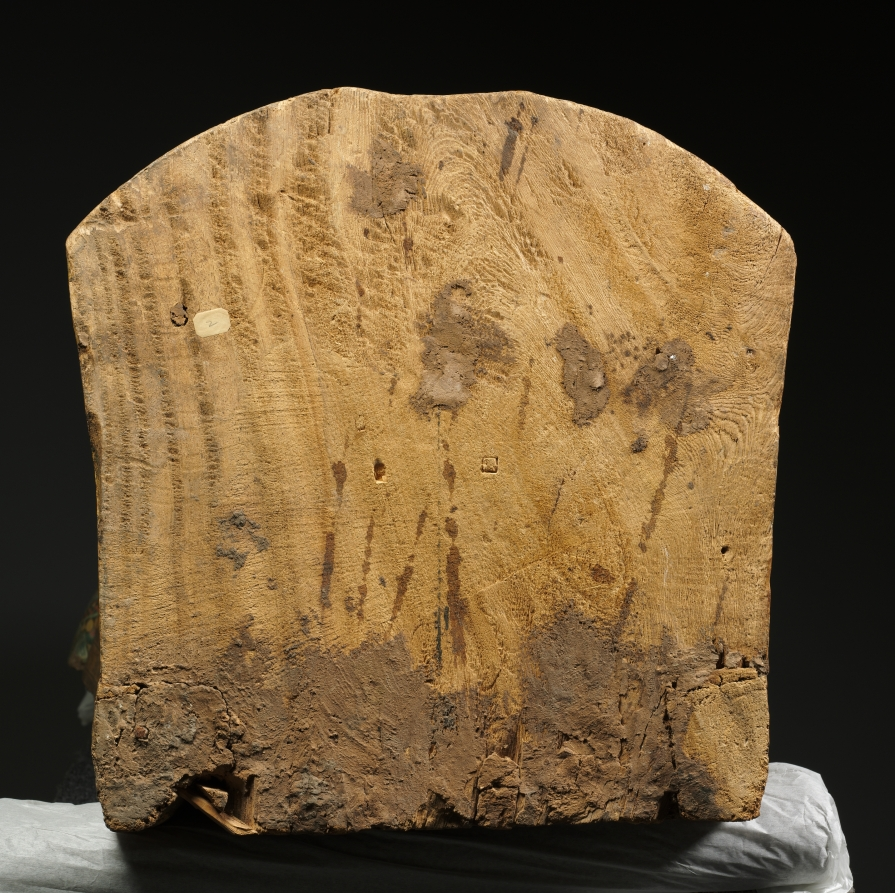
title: Coffin of Bakenmut (lid)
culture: Egypt, Thebes, Third Intermediate (1069–715 BCE), Dynasties 21–22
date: c. 1000–900 BCE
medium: gessoed and painted sycamore fig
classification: Funerary Equipment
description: The coffin of Bakenmut is one of the finest examples of painted wooden coffins made for the priests of Amen and their families at Thebes during Dynasty 21 and early Dynasty 22. The pharaohs of this time were no longer buried in the Valley of the Kings, but instead built tombs in the Delta, far to the north, where they resided. Security was lax in the Theban necropolis. The coffins and funerary goods of the wealthy citizens of Thebes were placed in unmarked and undecorated family tombs cut into the cliffs on the west bank of the Nile. All the care and detail that in more prosperous times were devoted to the decoration of the tomb chapel were now lavished on the elaborately painted coffins. Every available surface is crowded with religious scenes, images of funerary gods and goddesses, protective spells, and magical symbols. The deceased appears mummiform. An elaborate floral collar entirely covers the upper body, exposing only the separately attached hands (now lost). A pair of red "mummy braces" are crossed over the chest, their point of intersection marked by a winged sun disk. The lower body is covered with tiny figures modeled in gesso against a yellow background, which gives the effect of gold inlaid with glass or semiprecious stone. The decoration on the interior features two deified dead kings of Dynasty 18. Although these rulers had lived centuries before, memory of their greatness was still very much alive. The main scene near the top depicts Tuthmosis III, the great military pharaoh, who lived 500 years before Bakenmut. Posed as a mummy, the ruler wears a brilliant feathered garment enfolding him with falcon’s wings. The scene below features back-to-back seated images of Amenhotep I, regarded as the patron of the Theban cemetery and worshiped as a local god there.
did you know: Originally another smaller coffin was placed inside this outer coffin and in that the deceased with a mummy board would have rested.